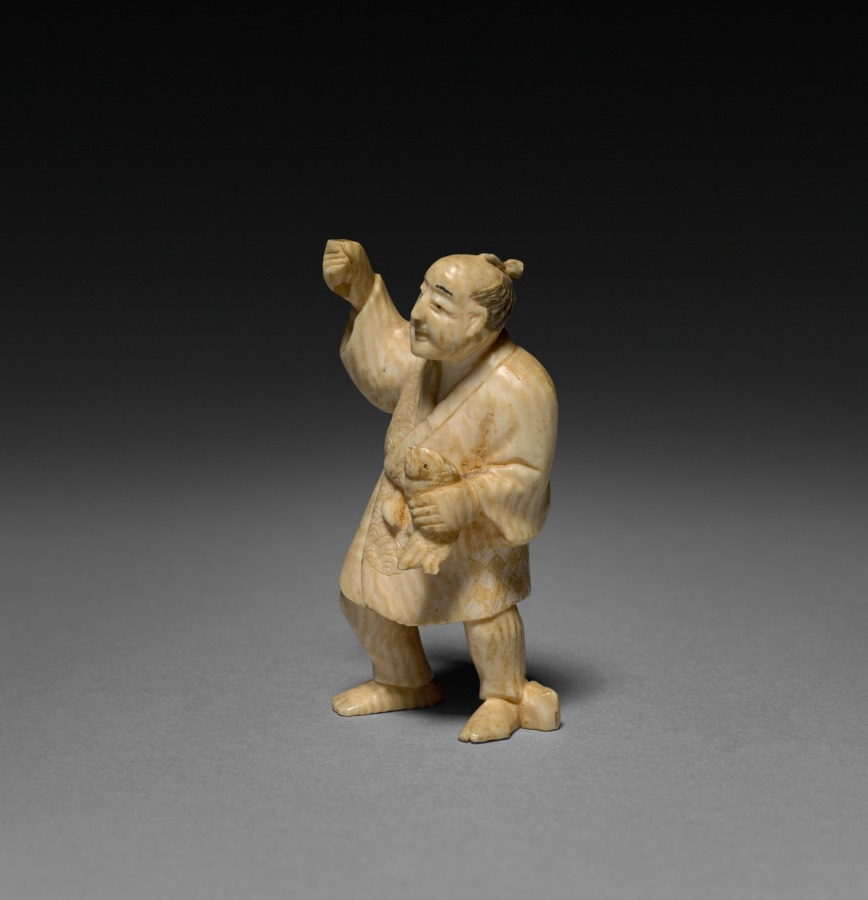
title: Man with Fish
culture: Japan, Meiji period (1868–1912)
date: early 1900s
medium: ivory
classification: Ivory